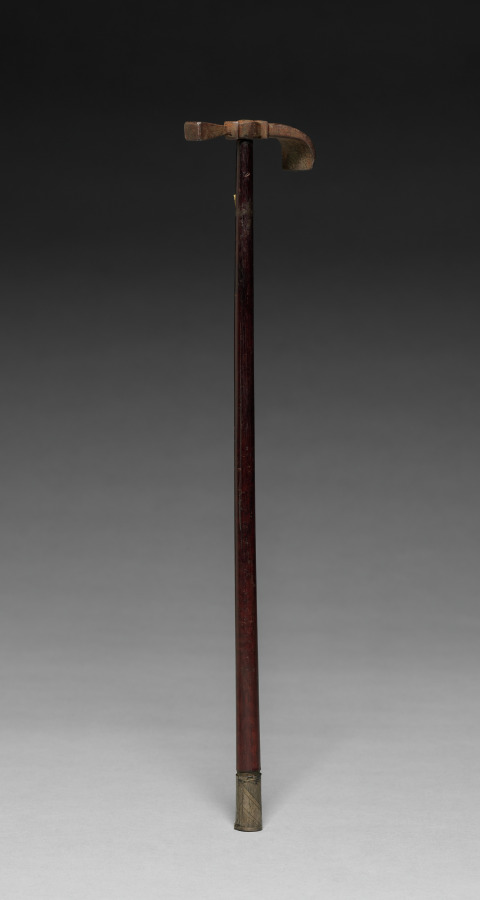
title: Jeweler's Hammer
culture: Europe, 17th century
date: 1600s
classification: Tool